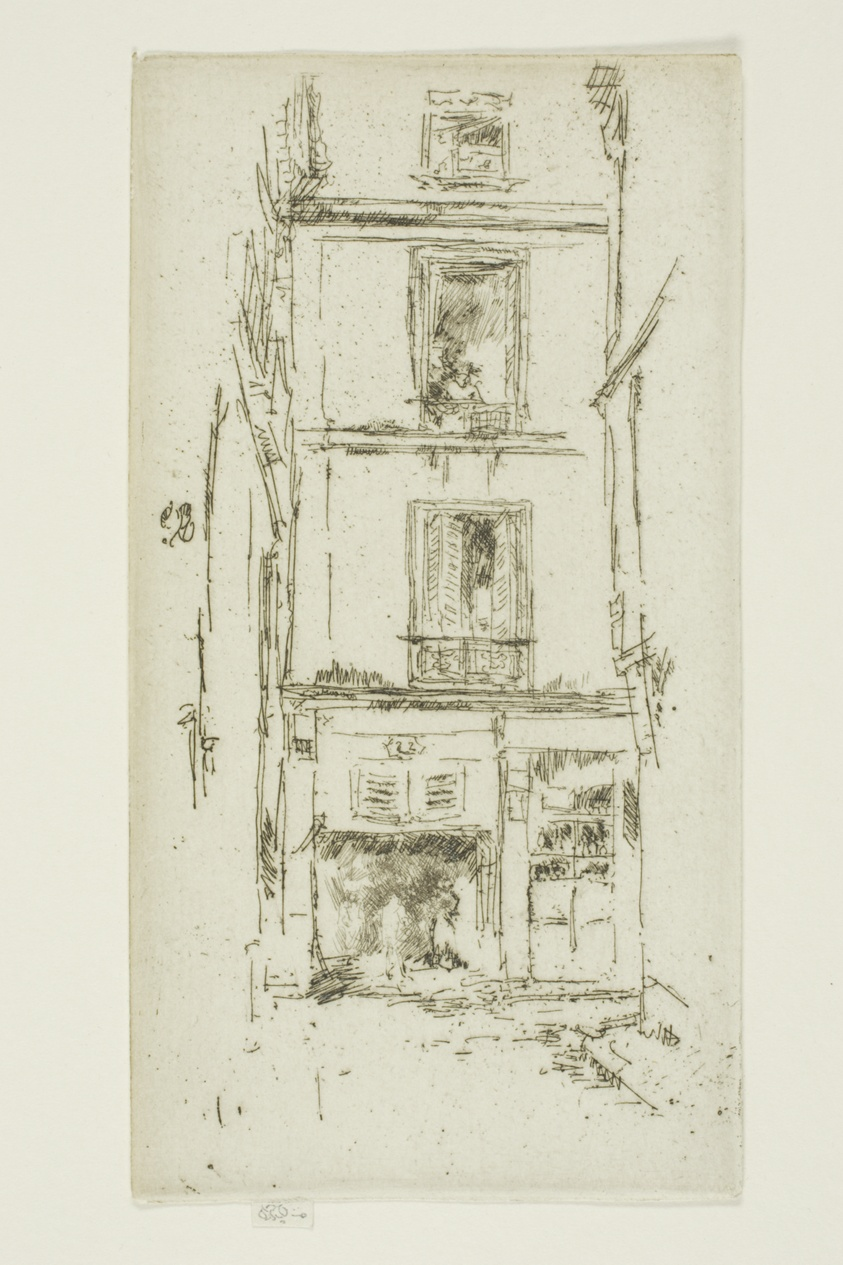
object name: Print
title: Rue des Bons Enfants, Tours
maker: James McNeill Whistler (American, 1834-1903)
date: 1888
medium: Etching with foul biting in black ink on off-white laid paper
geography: United States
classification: etching; foul biting; print; prints and drawing; paper